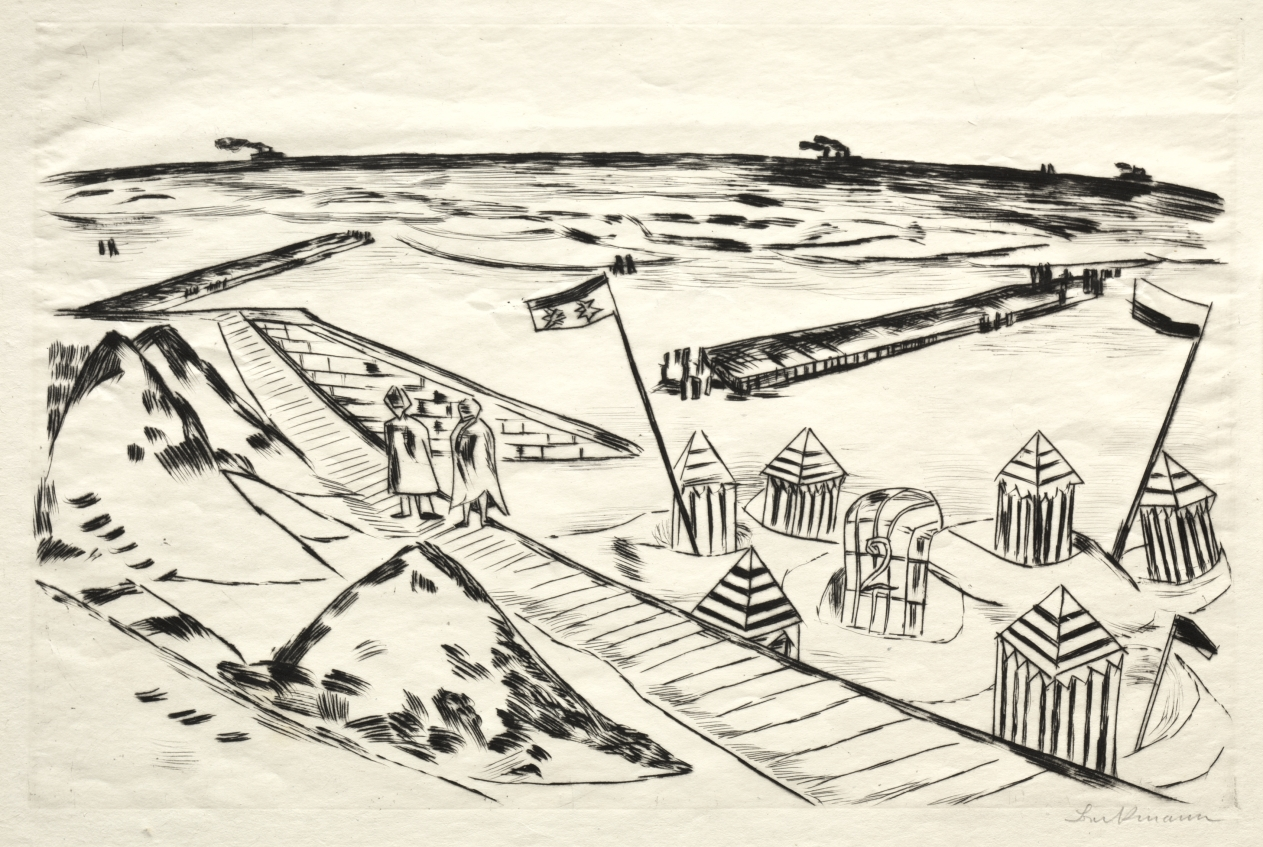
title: Beach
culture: Germany, 20th century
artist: Max Beckmann (German, 1884–1950)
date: 1922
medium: drypoint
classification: Print